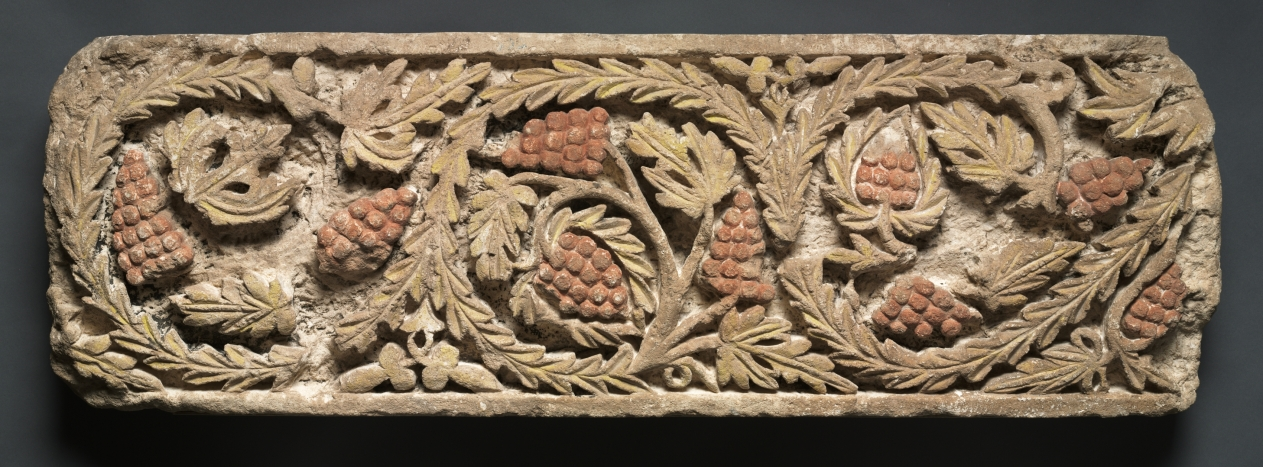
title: Frieze with Foliage and Grapes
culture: Egypt, Coptic period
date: 300s–400s CE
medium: limestone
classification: Sculpture